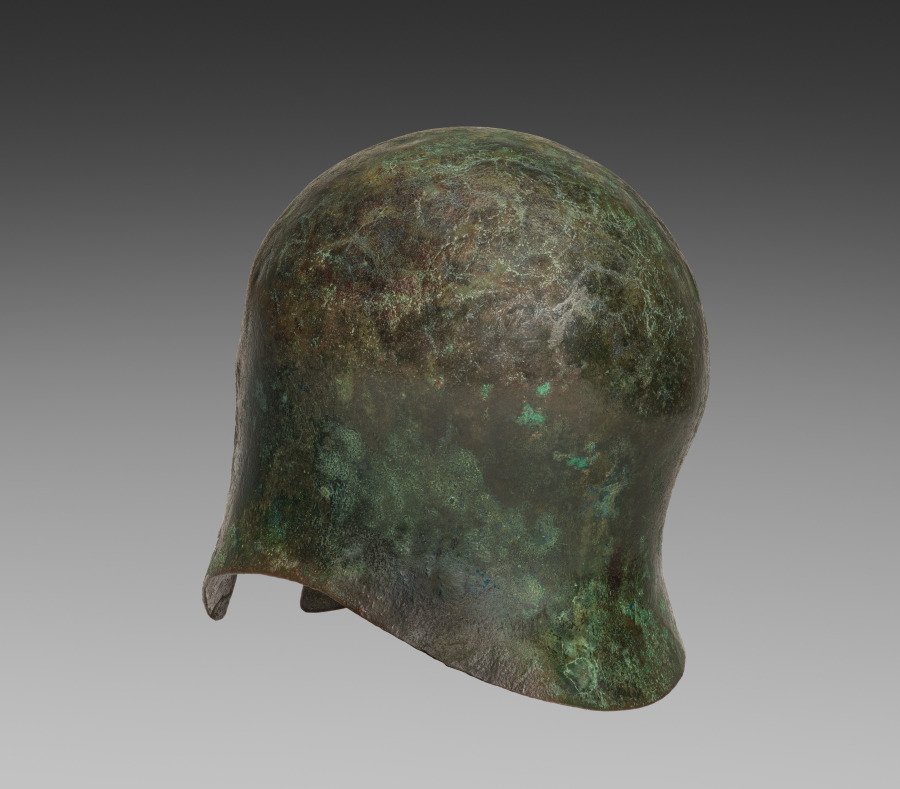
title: Corinthian Helmet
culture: Greek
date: c. 625–550 BCE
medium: Bronze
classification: Arms and Armor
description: This remarkably well-preserved bronze helmet belongs to an iconic type known as Corinthian yet produced far beyond the city of Corinth. Designed for use by hoplite warriors, who fought with spears and shields in shoulder-to-shoulder (phalanx) formation, such helmets provide maximum protection but limited vision, hearing, and movement. Probably first cast and then hammered into its final shape, the helmet features both gentle curves and sharp angles, evoking the head and face that it protected. Similar helmets appear frequently on warriors shown in ancient art, though often with crests of horsehair or other organic materials that no longer survive.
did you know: A small hole above the rear neckline, now repaired, may reflect a fatal blow.